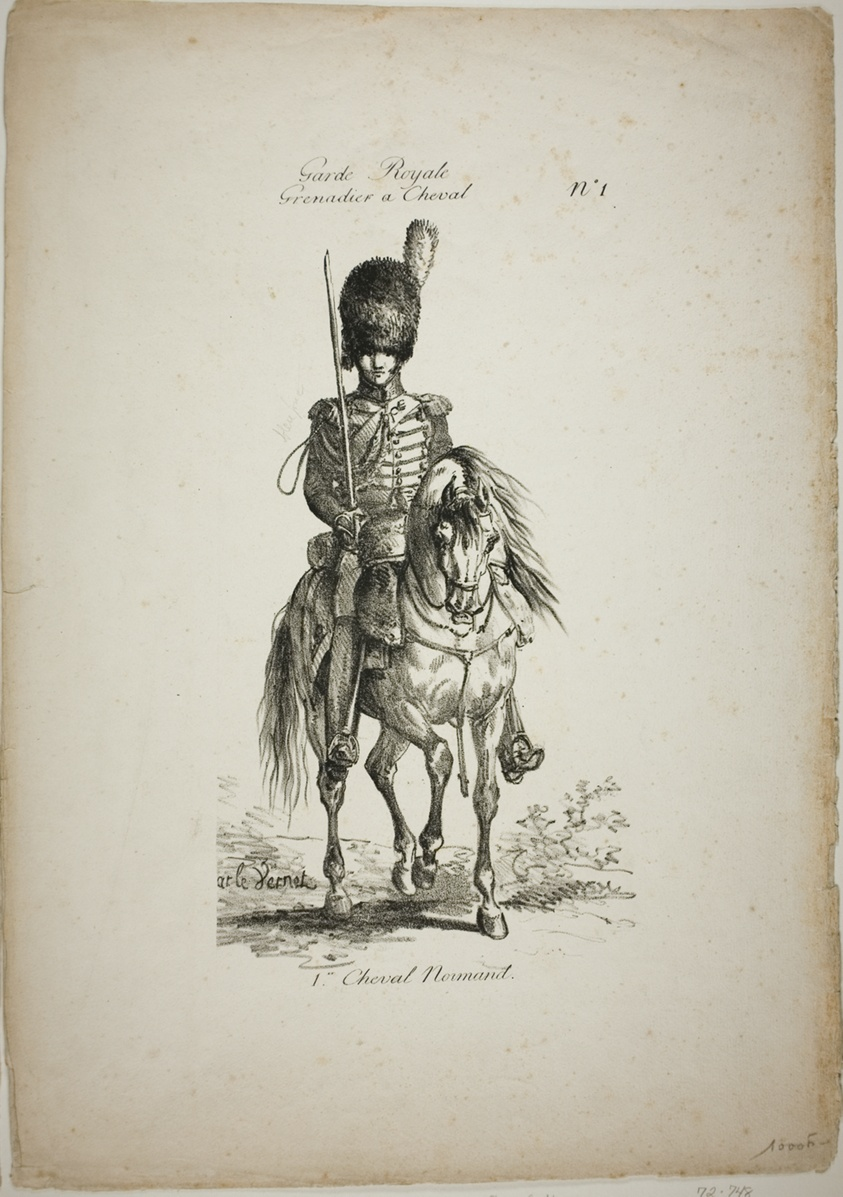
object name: Print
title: Royal Guard, Norman Mounted Grenadier and Horse, No. 1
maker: Carle Vernet (French, 1758-1836); printed by Comte de Charles Philibert Lasteyrie du Saillant (French, 1759-1849)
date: c. 1818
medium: Lithograph in black on ivory wove paper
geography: France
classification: lithograph; print; prints and drawing